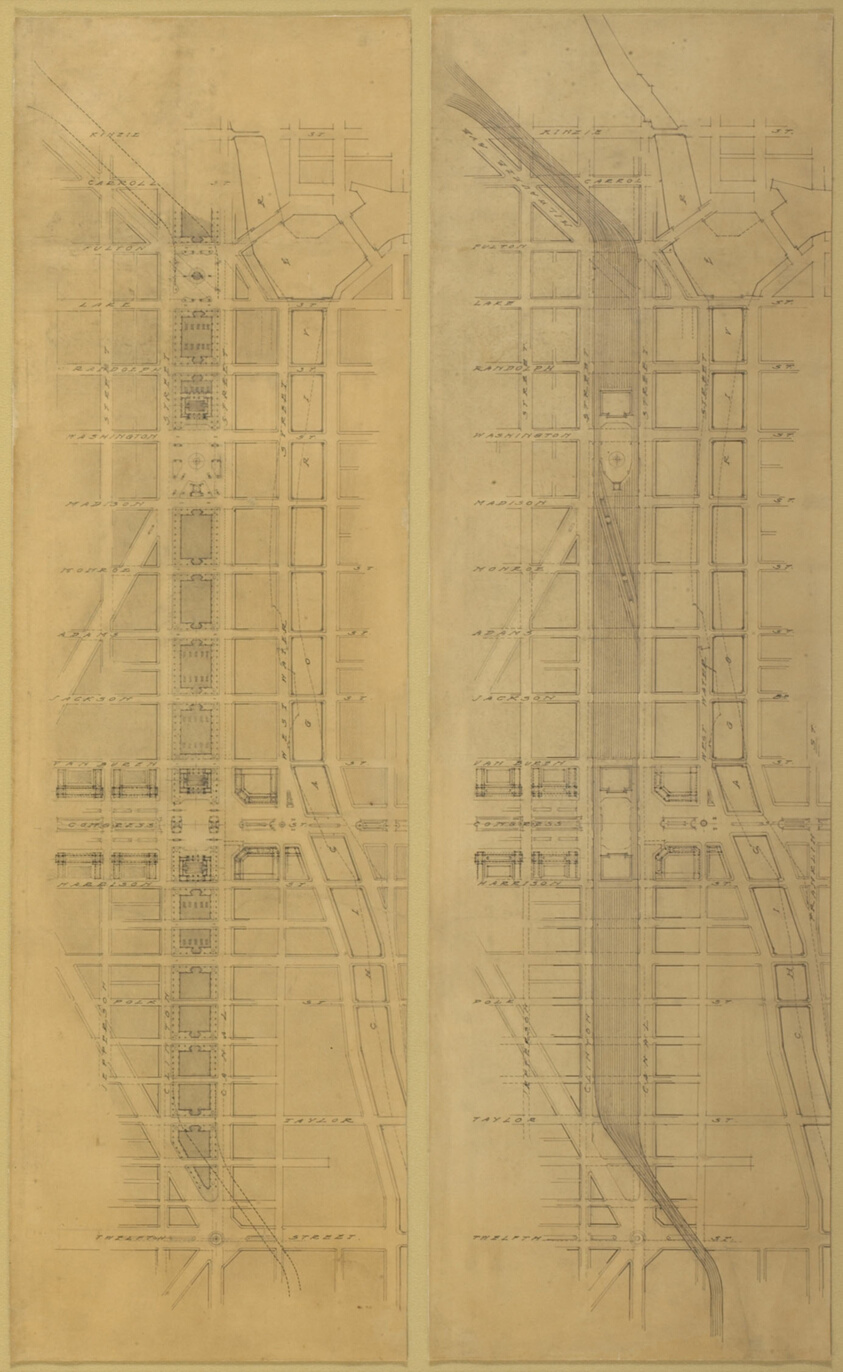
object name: Architectural Drawing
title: Plate 79 (2 Drawings) from The Plan of Chicago, 1909: Suggested Location and Arrangement of the Railway Passenger Stations West of the River. Overhead Scheme: 1. Plan at Street Level. 2. Plan Above Street Level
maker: Daniel Hudson Burnham, American, 1846-1912; Edward Herbert Bennett, American, born England, 1874-1954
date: 1909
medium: Ink on tracing paper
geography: Chicago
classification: ink; architectural drawing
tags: Chicago, architecture